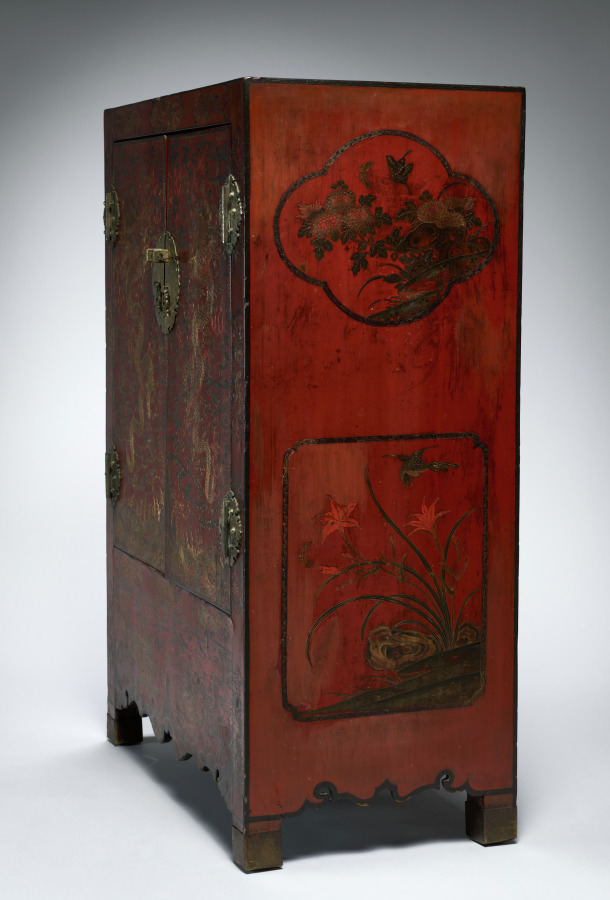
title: Double Cabinet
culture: China, Ming dynasty (1368-1644) - Qing dynasty (1644-1911)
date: 1600s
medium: red lacquer on wood with pigment and gilding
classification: Furniture and woodwork